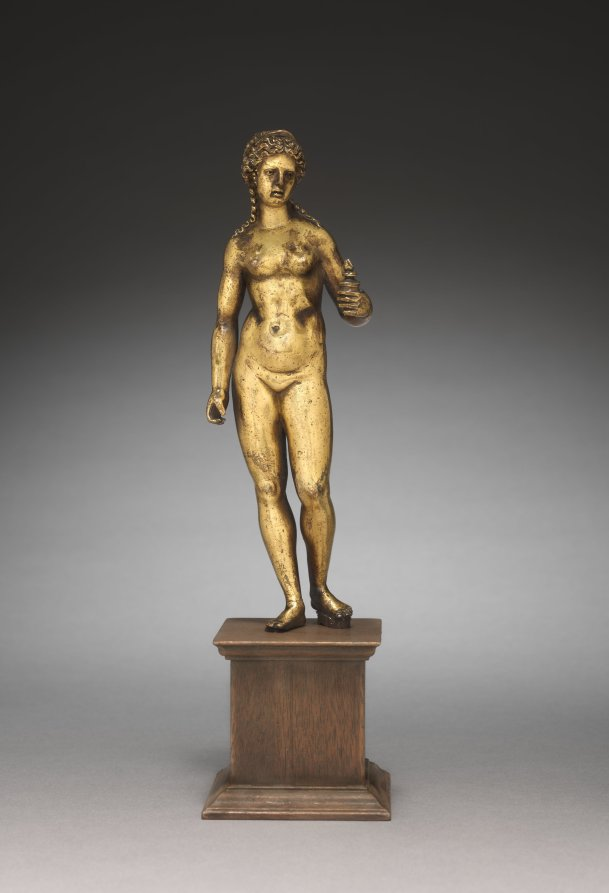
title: Venus with a Burning Urn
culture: Northern Italy, 16th century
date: c. 1500–1520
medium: gilt bronze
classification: Sculpture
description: Venus is the Roman goddess of many virtues, including Love, Charity, Fertility, and Victory. Here, Venus is represented as the goddess of Charity. She wears a crown, as Charity is often depicted as the Queen of the Virtues. The flaming lamp in Venus's left hand was also a symbol of Charity in Venice, where this piece is thought to have originated. The bent fingers of her right hand are bent suggest that Venus may have once held another object. Renaissance sculptors often looked back to antiquity when producing monumental and small bronze statues. The small bronze cabinet piece comes into Italian art during this time, bringing ancient gods and goddesses into Italian households. Venus stands in a contrapposto pose and, like Hellenistic and Roman objects, her locks are tied by a double ribbon while two curls fall on her shoulders. Her tilted head and large emotional eyes, as well as her small nose and parted lips reflect the influence of Hellenistic Greek facial styles.